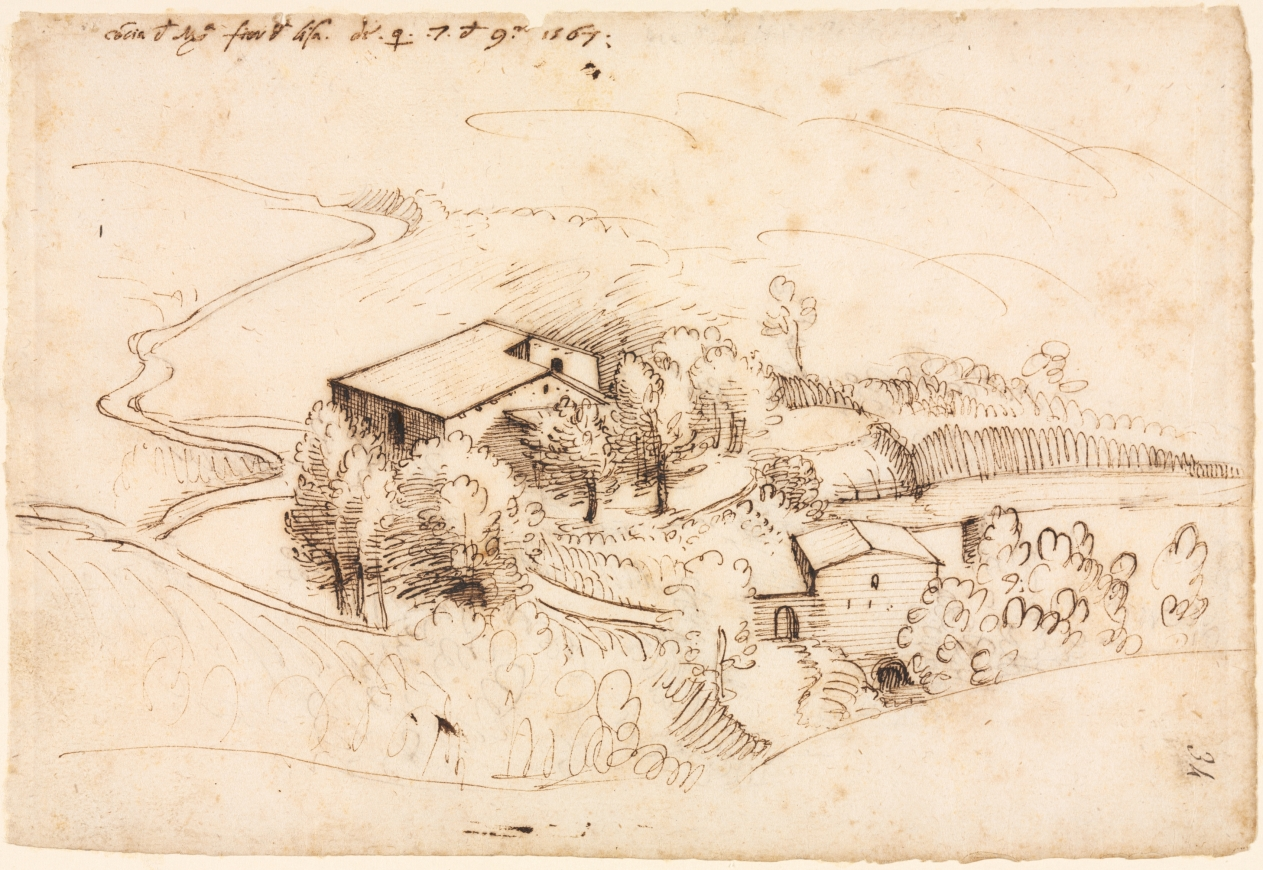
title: Farm with Trees in a Hilly Landscape (recto)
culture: Italy, 16th century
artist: Gherardo Cibo (Italian, 1512–1600)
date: 1567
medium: pen and brown ink (iron gall)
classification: Drawing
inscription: by artist, upper left and upper center, in brown ink: concia d[el]. Mga[a superscript] fior d[i]. lisa. d[i]e. q[uinta]. .7. d[ie]. 9.re 1567: ; lower right, in brown ink: 34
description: Gherardo Cibo was more botanist than professional artist. The compiler of at least five volumes of dried plant specimens collected in the Marches (central-eastern) region of Italy, Cibo made drawings in order to record the habitats where he collected plants. He executed this drawing in the field, annotating at upper left the dried cornflower (concia fior da liso) he had gathered on the spot. Though Cibo learned to draw landscapes at an early age when he visited Northern Europe, this sheet reveals his knowledge of Florentine and Venetian models.